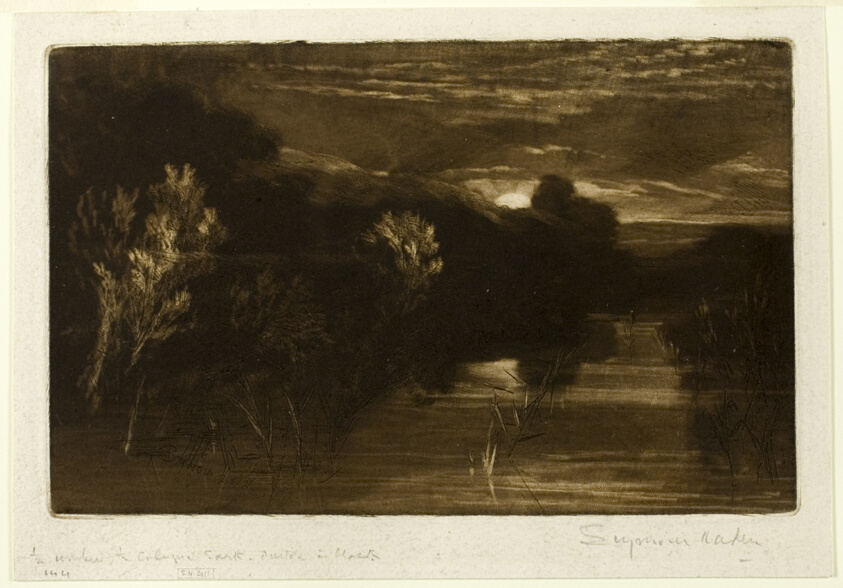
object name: Print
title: Winchelsea Canal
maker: Francis Seymour Haden (English, 1818-1910)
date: c. 1877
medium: Etching and mezzotint on ivory wove paper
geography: England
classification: mezzotint; print; prints and drawing